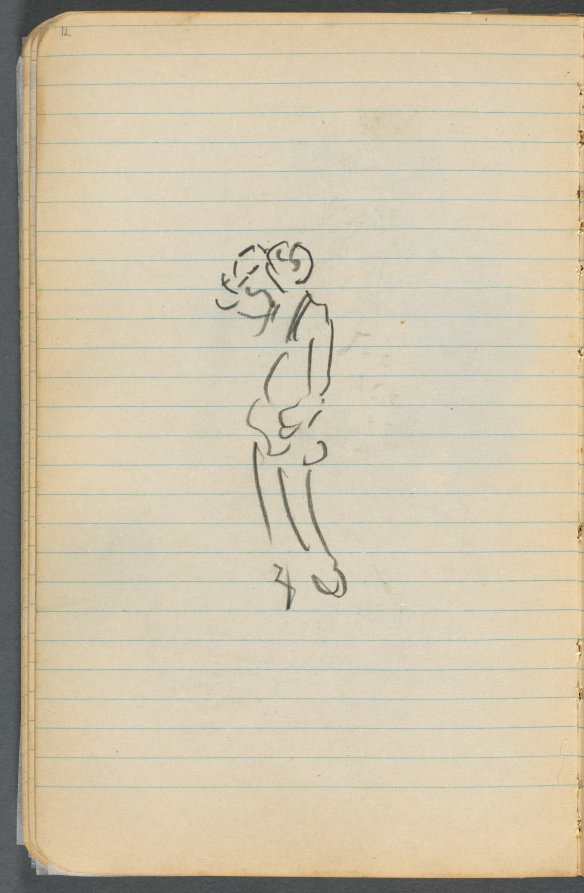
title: Sketchbook, page 071: Figure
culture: America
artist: Maurice Prendergast (American, born Newfoundland [now Canada], 1858–1924)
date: 1905–10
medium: graphite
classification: Bound Volume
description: This sketchbook contains 69 pages of drawings, a diary largely devoted to the state of the artist's health, and a three-page discourse on the nature of genius and ideas.